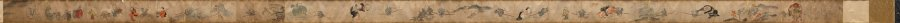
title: The Illustrated Tale of Oishi Hyōroku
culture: Japan, Edo period (1615–1868)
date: 1700s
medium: handscroll; ink and color on paper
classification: Painting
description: This incomplete handscroll illustrates part of the story of Oishi Hyoroku, a young man tasked with battling fox apparitions who were creating problems in his town. In other extant versions of the scroll, the story is set in the fall of 1624 in Kagoshima in southern Japan. Throughout the story, Hyoroku is tricked and terrified by the foxes that shift their shapes into a variety of monstrous phantoms. After repeated humiliations, he eventually captures two of the foxes. In this version, colloquial texts that function like text blurbs in comics appear throughout the scroll, but the main text is missing.